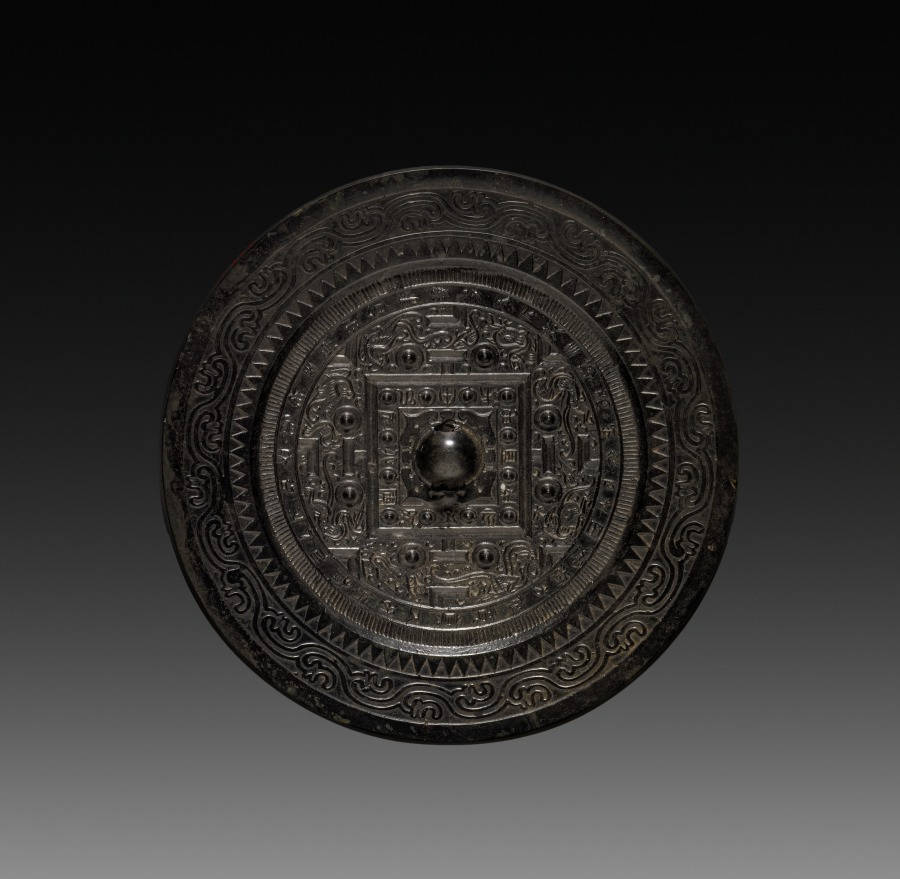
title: TLV Mirror with Multiple Nipples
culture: China, Eastern Han dynasty (25–220 CE)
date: 1–200 CE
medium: bronze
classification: Metalwork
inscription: (after Karlgren, "Early Chinese Mirror Inscriptions," Bulletin of the Museum of Far Eastern Antiquities No. 6 [1934], no. 215): The Shang-fang has made the mirror, it is truly very good; on it are Immortals who do not know aging; when thirsty they drink from the jade springs; when hungry they eat dates; they roam about in the whole world and ramble [everywhere between] the four seas; may your longevity be like [that of] metal and stone; may you be a protector of the country.